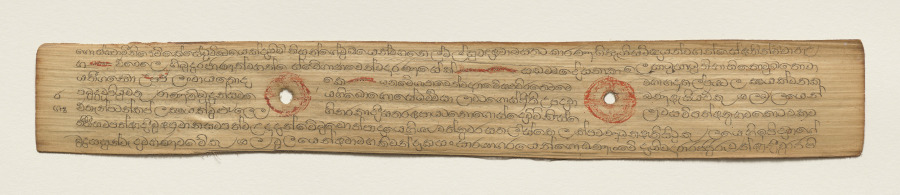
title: Leaf from a Buddhist Manuscript (recto)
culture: Sri Lanka, Singhalese, Late 17th century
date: c. 1700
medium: fiber paper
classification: Manuscript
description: Palm leaf material is still used for manuscripts in Sri Lanka. The palm leaves are prepared first by boiling them, drying them in the sun, and then rubbing them with oils. Scribes then use a metal stylus to incise the text. Then charcoal powder is wiped across the pages, filling in only the inscribed lines.